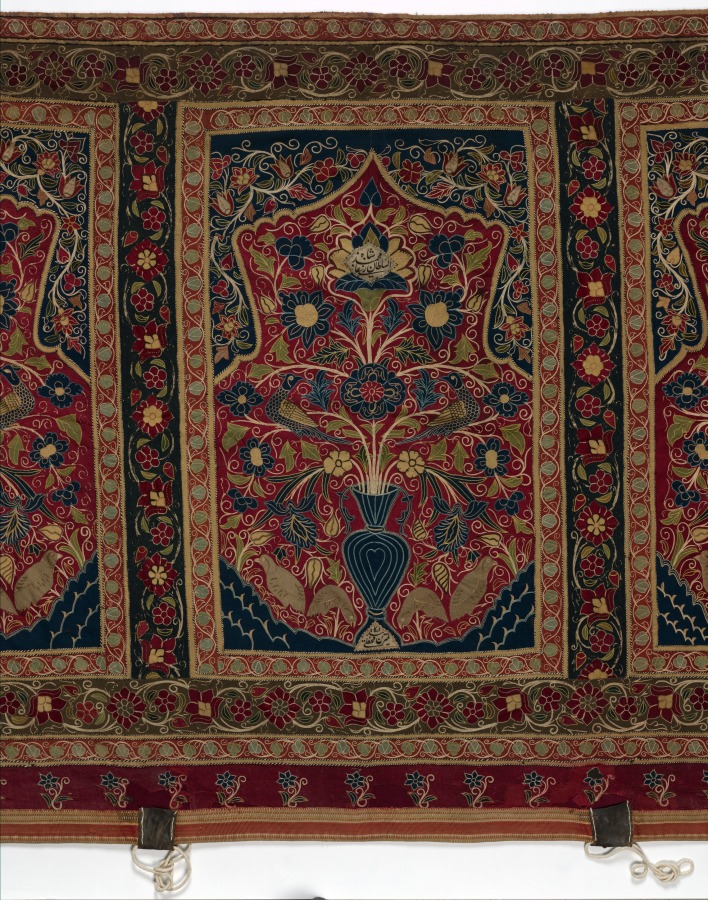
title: Royal Round Tent made for Muhammad Shah (wall panel with three design units)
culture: Iran, Rasht, Qajar period (1779-1925)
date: 1834–48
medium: Wool with silk embroidery (chain stitch), rope, cotton, leather, tape; Rasht work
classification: Textile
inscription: Inscriptions: The central design unit of this wall panel has two embroidered inscriptions. 1. Upper inscription (center of the top blossom): "Muhammad shah sultan-e ghazi."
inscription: 2. Lower inscription (on the base of the vase): "Kamtarin bandeh-ye dargah fath'ali."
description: Royal tents were potent symbols of authority, wealth, and power throughout the greater Middle East. Rulers owned thousands of tents. They were used for shelter, shade, and innumerable functions in tent compounds that were essential for imperial ceremonies, travel, and military campaigns. Distinguished by size with elaborately decorated interior walls and ceilings, tents could be as large as castles. Opulent tents were also presented as imperial gifts. Tents are only known through documents before 1600. For example, in Baghdad in 809, Caliph Harun al-Rashid owned 4,000 ceremonial tents and 150,000 camping tents that were stored in the imperial Abbasid treasury. An astonishing variety and quantity of tents were housed in the royal Fatimid tent storeroom in Cairo in 1068-69, including "military tents, fortress tents, and castle tents, manufactured of . . . gold-brocaded stuff embroidered with designs of elephants, wild beasts, horses, peacocks, birds." Since 1600, Ottoman Turkish tents with elaborate floral decoration have been preserved in Istanbul in the Topkapi Palace Museum and Military Museum, and in European collections as war booty, primarily from the Ottoman Turks' attempt to conquer Vienna in 1683. These tents are not done in the Rasht technique, but rather are applique. In contrast, royal tents from Iran are extremely rare. This spectacular ceremonial tent is embroidered with the name of its owner, Muhammad Shah, who ruled Iran from 1834 to 1848 during the Qajar dynasty. The radiant jewellike interior features exuberant flora, blossoming vines, and robust birds made with colored wool embellished with silk-thread embroidery.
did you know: Rasht work is named after the city on the Caspian Sea in present-day Iran, which was a major silk trade center with numerous textile workshops.